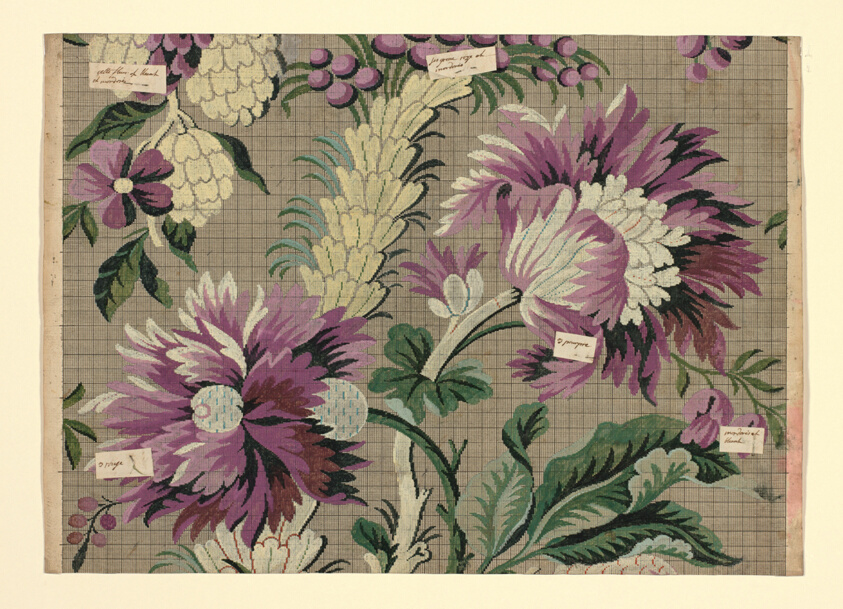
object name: Drawing and Watercolor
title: Mise-en-carte (Point-paper)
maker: Designed by J Bte Clere and Germain Frères; France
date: 1760/90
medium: Ink and gouache on hand drawn graph paper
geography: France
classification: textile; accessory - paper design